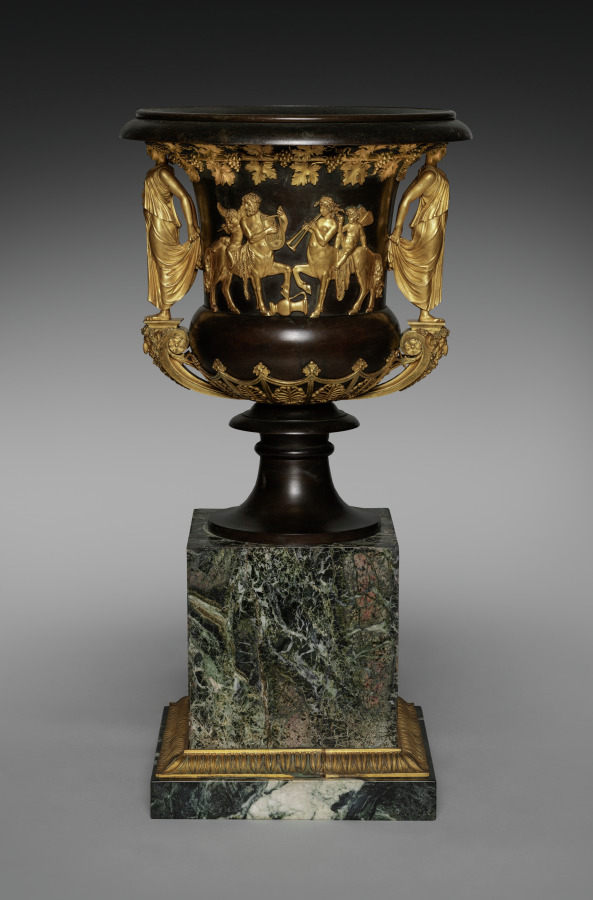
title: Vase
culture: France, late 18th-early 19th Century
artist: attributed to Pierre Philippe Thomire (French, 1751–1843)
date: c. 1800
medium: bronze, partially gilt, marble base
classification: Metalwork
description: In 1798, a large quantity of French furnishings was acquired for the Michael Palace in St. Petersburg, Russia. Some of these pieces survive in museums like the Hermitage Museum in St. Petersburg. This institution recently staged an exhibition of such French pieces by and attributed to Thomire. Among the objects shown was a bronze vase virtually identical in design to this piece. The body of this vase is decorated with two small reliefs showing male and female centaurs with putti riding on their backs. These reliefs also occur on silver wine coolers produced by the Odiot firm, a major Parisian silversmith under Napoleon's empire. The Odiot firm still owns models of these reliefs that, according to tradition, had been given to Jean-Baptiste Claude Odiot by Thomire.